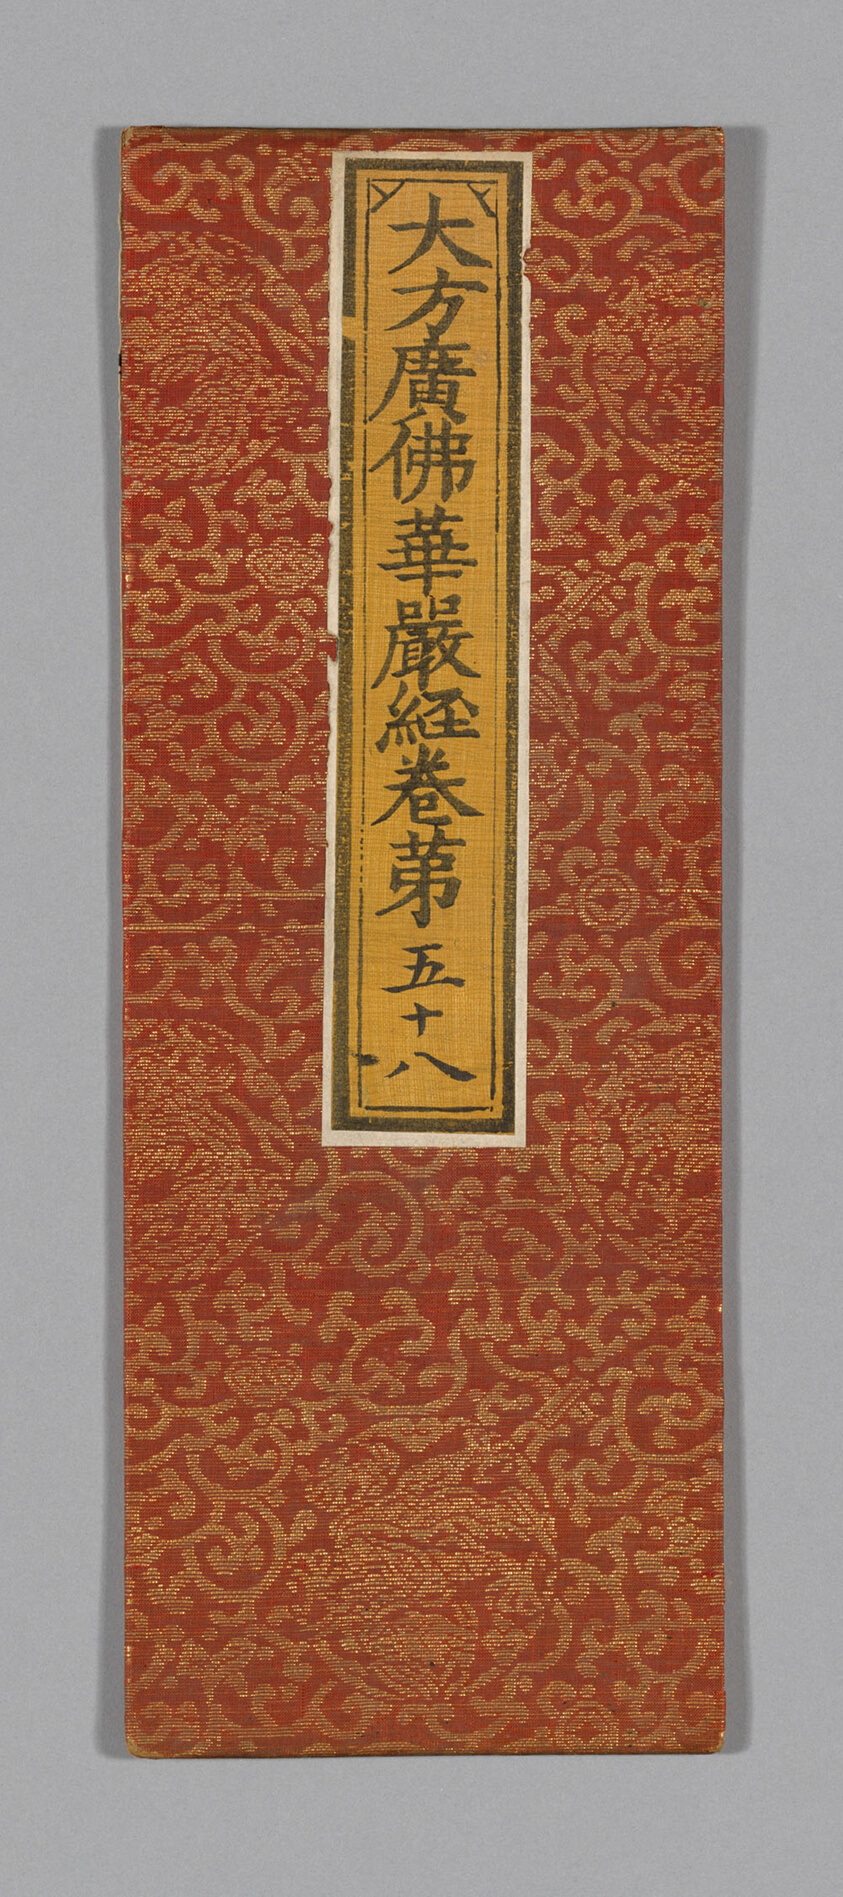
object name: Textile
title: Sutra Cover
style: ming, Chinese (culture or style), East Asian, asian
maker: China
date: Ming dynasty (1368–1644), c. 1590's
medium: Silk and gold-leaf-over-lacquered-paper strips, plain weave with supplementary patterning wefts bound in plain interlacings; label: silk, plain weave; painted with ink; glued over paper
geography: China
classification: textile; weaving